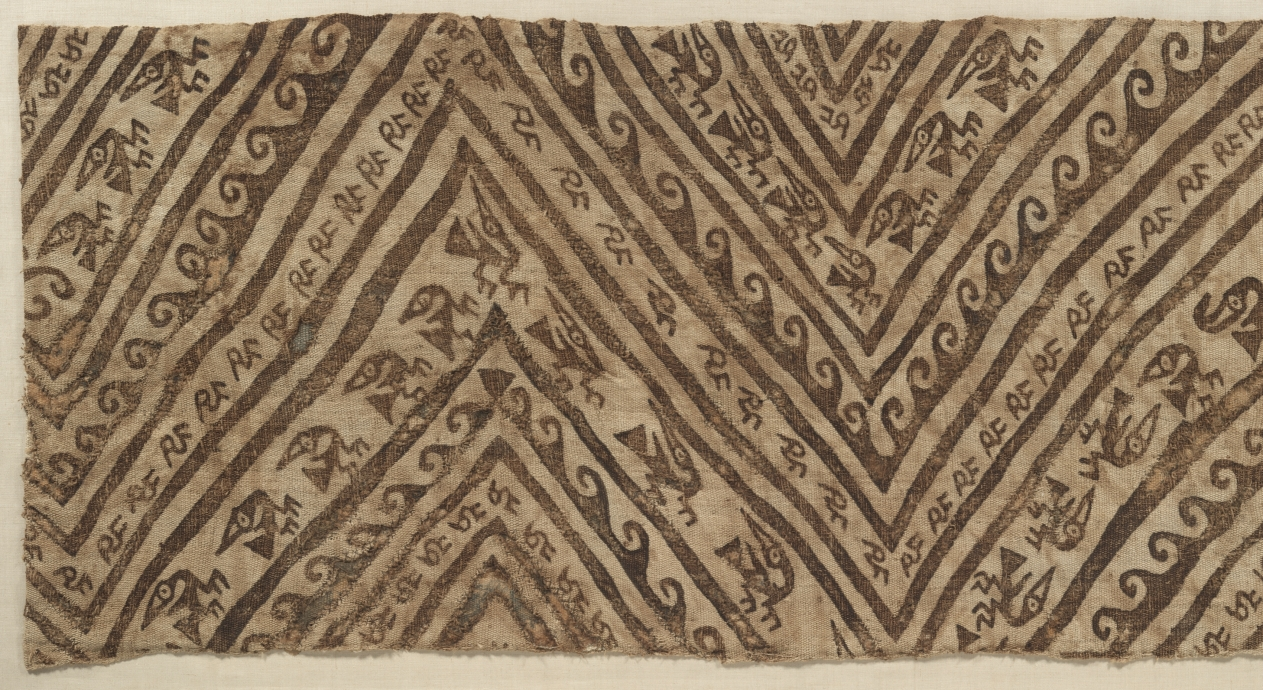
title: Painted Wrapping for Mummy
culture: Peru, Central Coast, Chancay, 12th-15th century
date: c.1100–1400 A.D.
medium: plain cloth, painted; cotton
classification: Textile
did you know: Fine textiles were one of the most prestigious commodities in the ancient Andes.